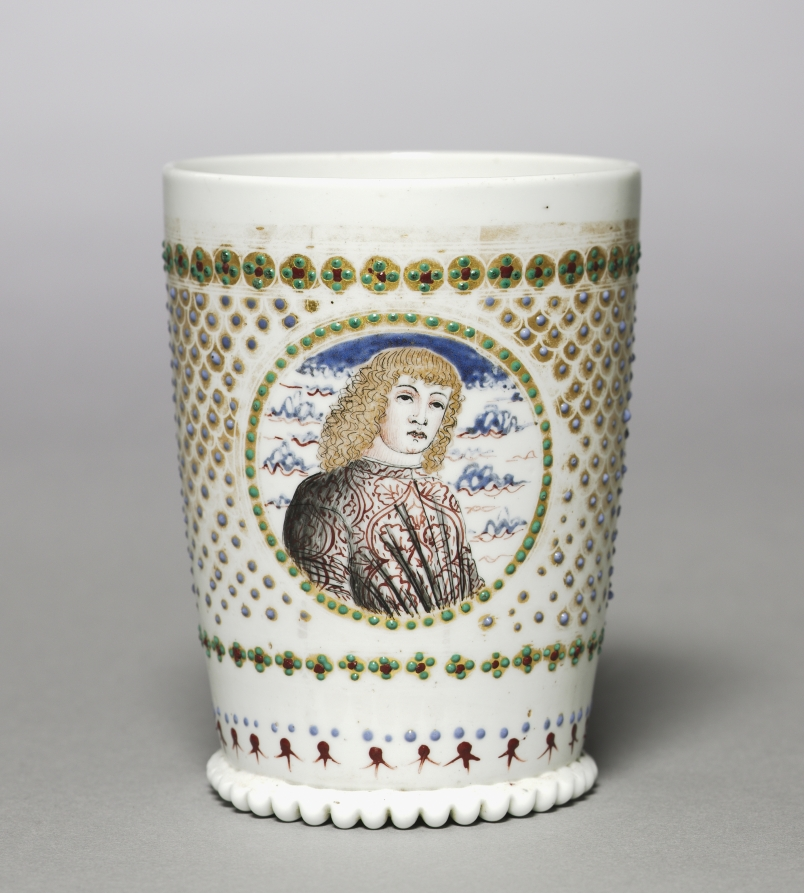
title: Marriage Beaker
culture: Italy, Venice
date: late 1400s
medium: opaque glass (milk glass or lattimo), enameled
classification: Glass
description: By the mid-1400s the word lattimo had come to mean glass made milk-like by the addition of opacifying materials, such as an oxide of tin. It was imitative of Chinese porcelain. Only fourteen surviving pieces of lattimo vessels are recorded. These beakers may have been intended as betrothal or wedding gifts. This one is enameled with idealized portrait heads of a young man and woman. Such portrait heads of young women were also a feature of Italian Maiolica, especially those at Deruta (see "love dishes" in Gallery 219).